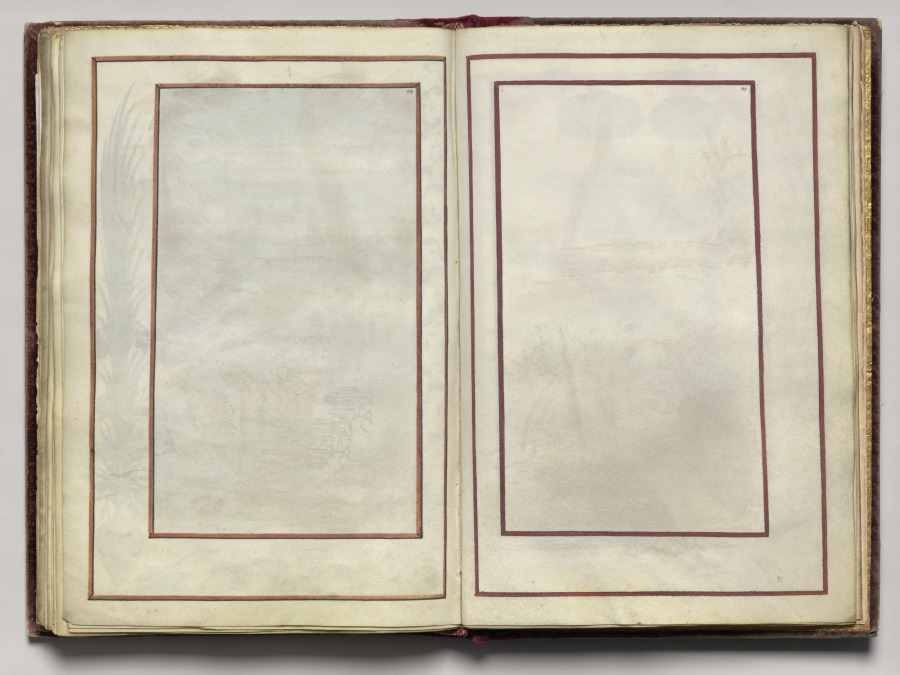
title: Border, folio 41 (verso), from Florilegium (A Book of Flower Studies)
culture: France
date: 1608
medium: watercolor, ink, silver and gold over occasional traces of pencil, on vellum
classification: Bound Volume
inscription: Dated: Poitiers 1608 (on frontispiece) Signed: On frontispiece in black ink, lower right: Van Kuyk Notation on drawing: Frontispiece: in pencil, lower margin: * élève de Van Kessel, peintre flammand (* in pencil also appears in front of Van Kuyk's name).